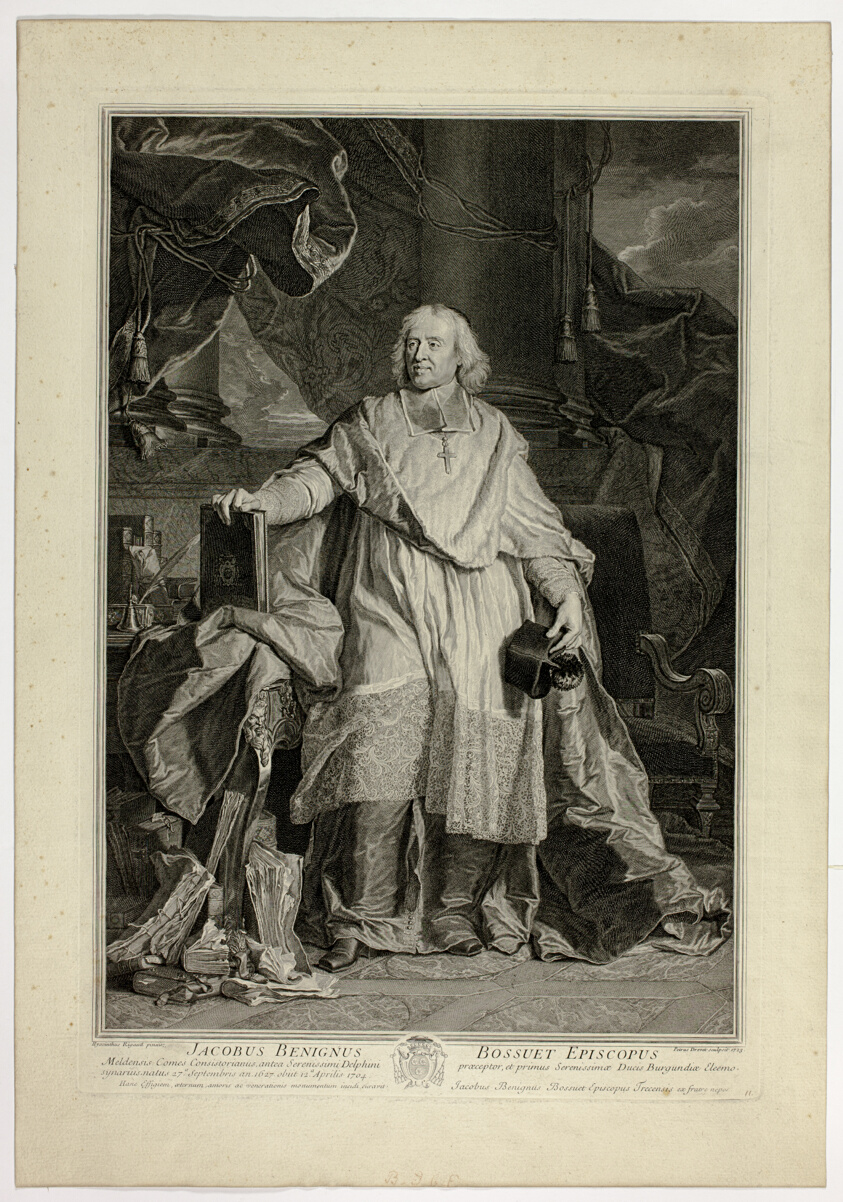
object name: Print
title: Portrait of Jacques Bénigne Bossuet, Bishop of Meaux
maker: Pierre-Imbert Drevet (French, 1697-1739); after Hyacinthe Rigaud (French, 1659-1743)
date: 1723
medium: Engraving on cream laid paper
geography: France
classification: engraving; print; prints and drawing